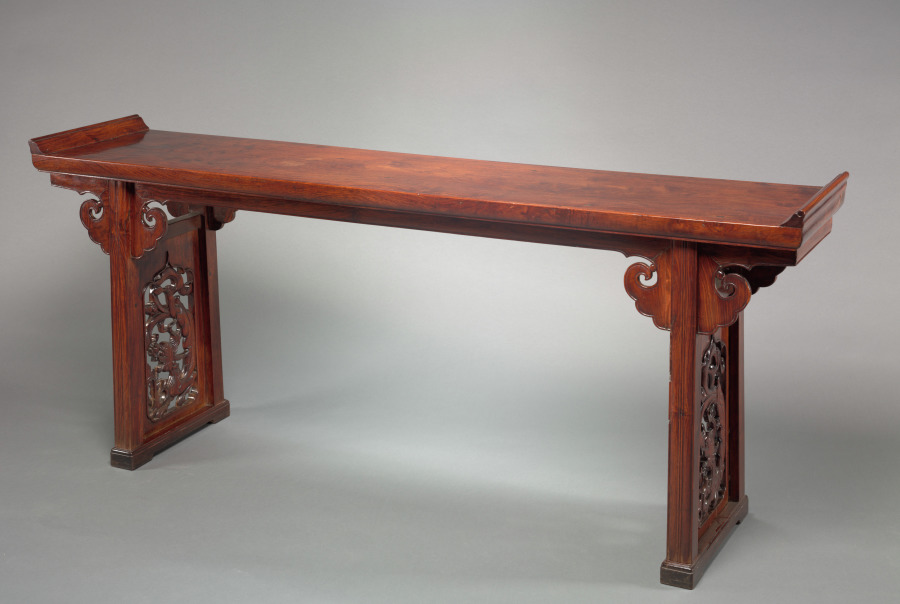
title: Side Table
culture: China, Ming dynasty (1368-1644) or Qing dynasty (1644-1911)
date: 1600s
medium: Rosewood (huanghuali)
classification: Furniture and woodwork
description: Long, rectangular tables were often placed against a wall to hold candlestands, flower vases, or incense burners. It was customary to hang ancestor portraits, images of religious figures, or seasonal paintings above the table that would convey auspicious wishes and blessings to the family. The high legs show stylized cloud-shaped spandrels. At each end of the table, between the recessed legs, are carved openwork panels with a lively dragon motif.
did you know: The table top is made of a single plank of wood.